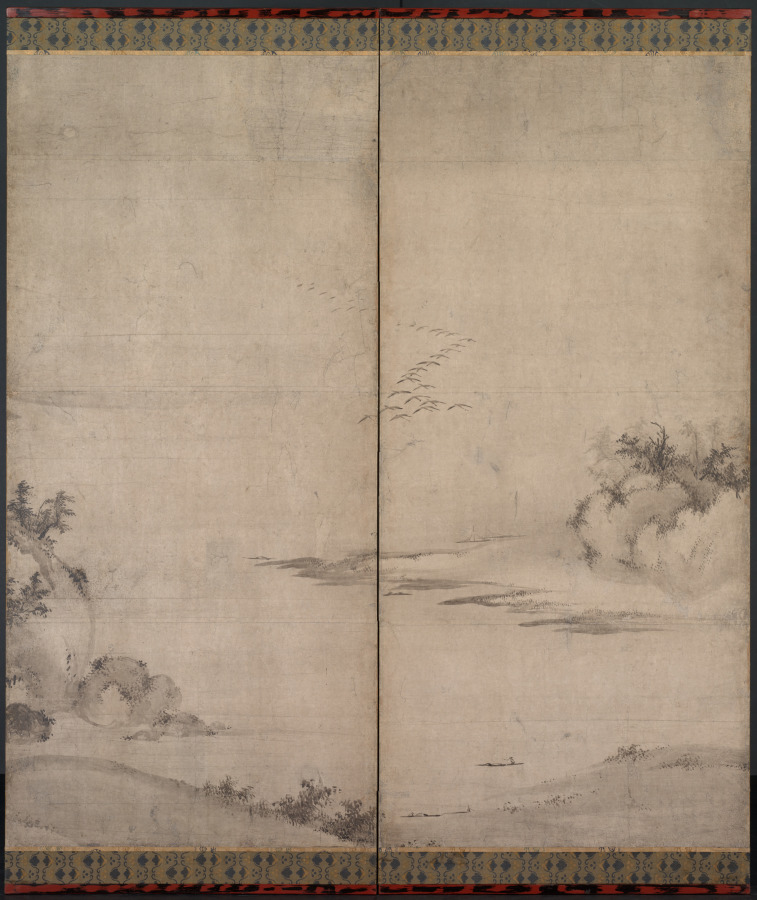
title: Landscape with Motifs from the Eight Views of Xiao-Xiang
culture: Japan, Momoyama period (1573–1615)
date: late 1500s–early 1600s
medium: One of a pair of six-panel folding screens; ink on paper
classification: Painting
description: This screen is from a separated pair depicting the Eight Views of Xiao-Xiang, a Chinese painting and poetry theme. Read in the manner customary for Japan, from right to left, the motifs here are “Evening Bell from a Mist-Shrouded Temple,” “Wild Geese Descending to a Sandbar,” “Sunset Glow over a Fishing Village,” and “Mountain Market in Clearing Mist.” The “crab-claw” style of the trees, in which the branches resemble the curved claws of a crab, and the stippling effect indicate a familiarity with Korean interpretations of Chinese painting styles of the Song dynasty..